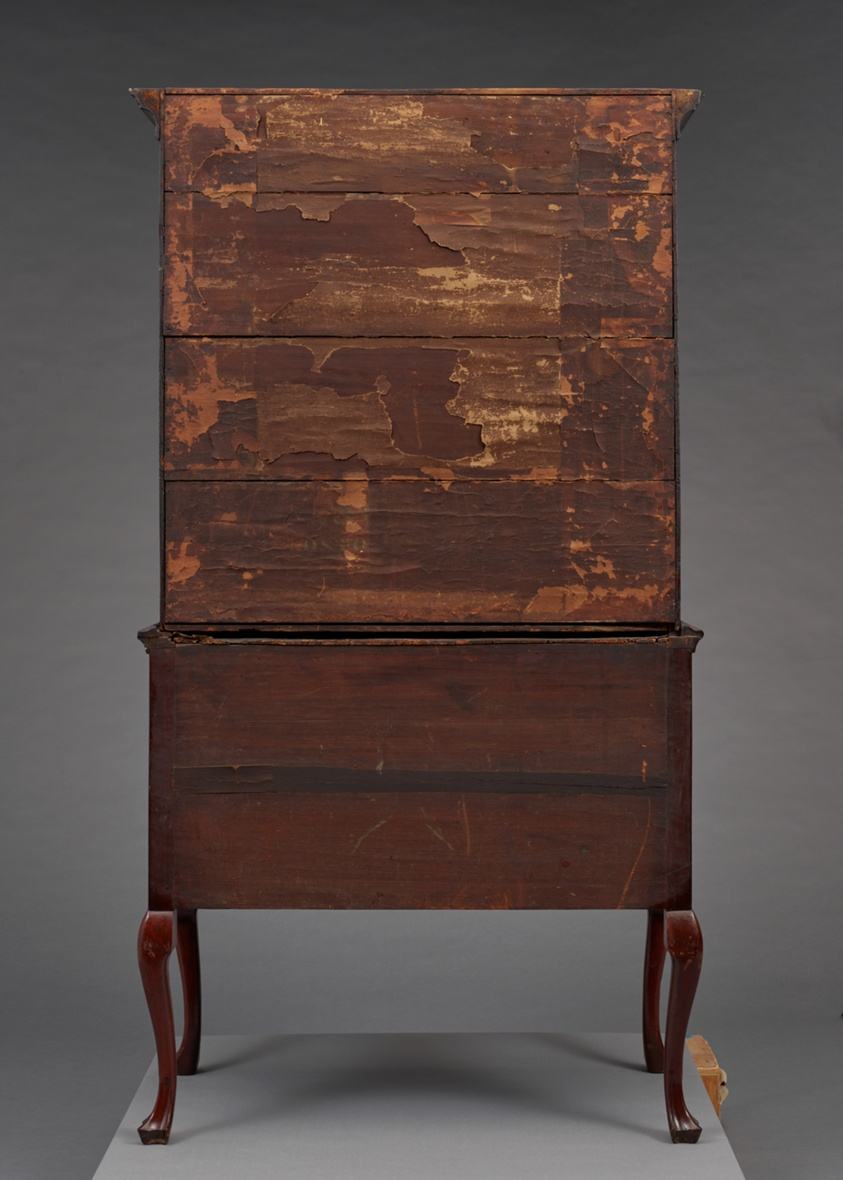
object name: Furniture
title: High Chest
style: queen anne, 18th Century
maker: Artist unknown (American, 18th century); Pennsylvania or New Jersey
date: 1740–60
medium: Cherry and brass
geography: United States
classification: american decorative arts; american arts; furniture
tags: clam shell, scalloping